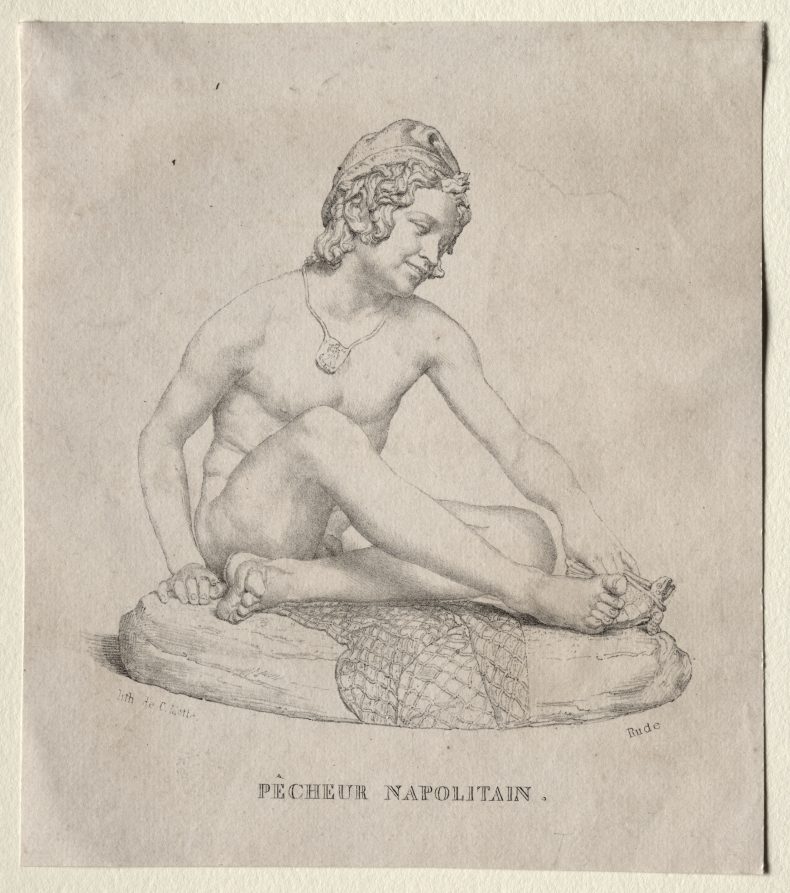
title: Neopolitan Fisherman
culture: France, 19th century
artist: François Rude (French, 1784–1855)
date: 1835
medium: lithograph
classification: Print